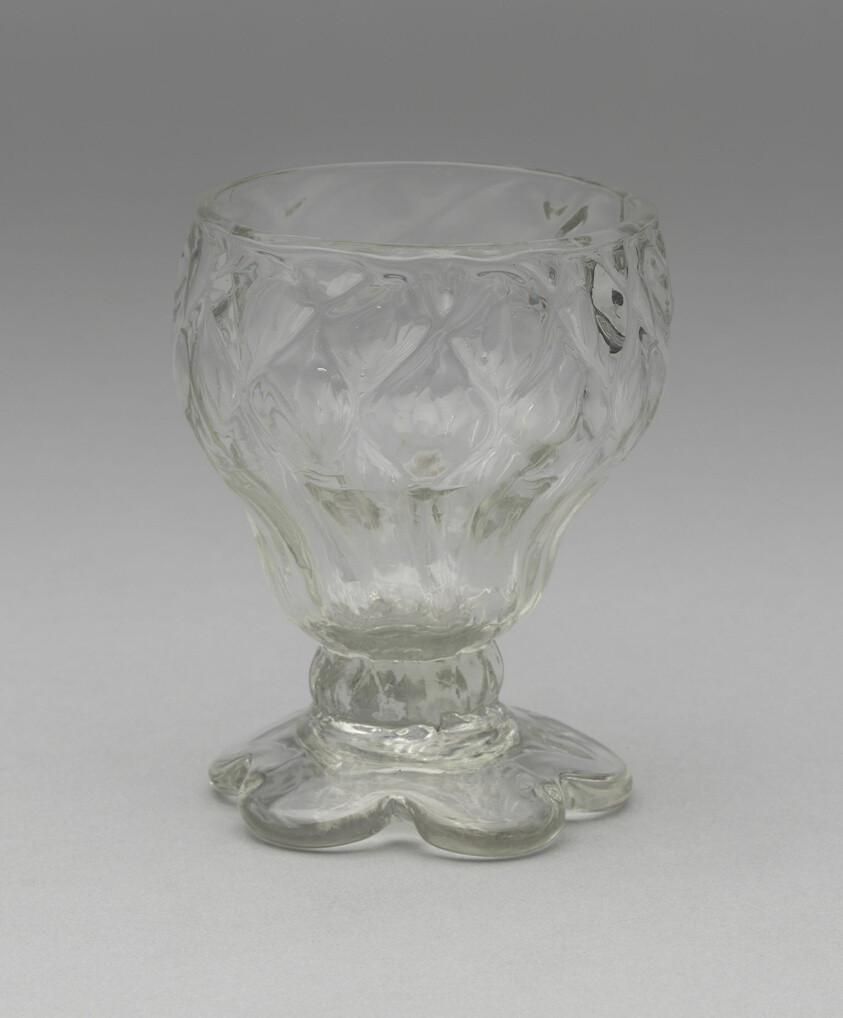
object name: Glass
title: Salt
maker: Artist unknown (American, 19th century)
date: 1800–25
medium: Glass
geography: Manheim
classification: saltcellar; glass; dish (vessel); american decorative arts; american arts; decorative arts